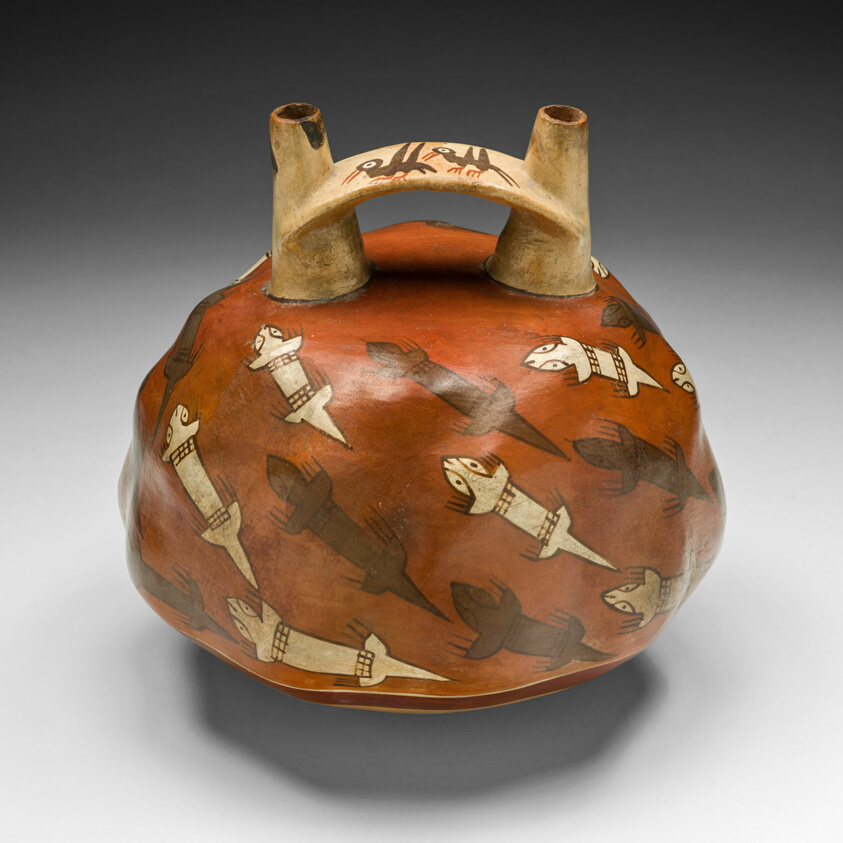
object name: Vessel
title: Vessel with Lizards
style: nazca, early intermediate period, Pre-Columbian, americas, andes, Arts of the Americas, andean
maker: Nazca; South coast, Peru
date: 180 BCE–500 CE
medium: Ceramic and pigment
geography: Peruvian South Coast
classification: ceramics; earthenware; art of the americas; vessel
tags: landscapes, animals, birds, lizards